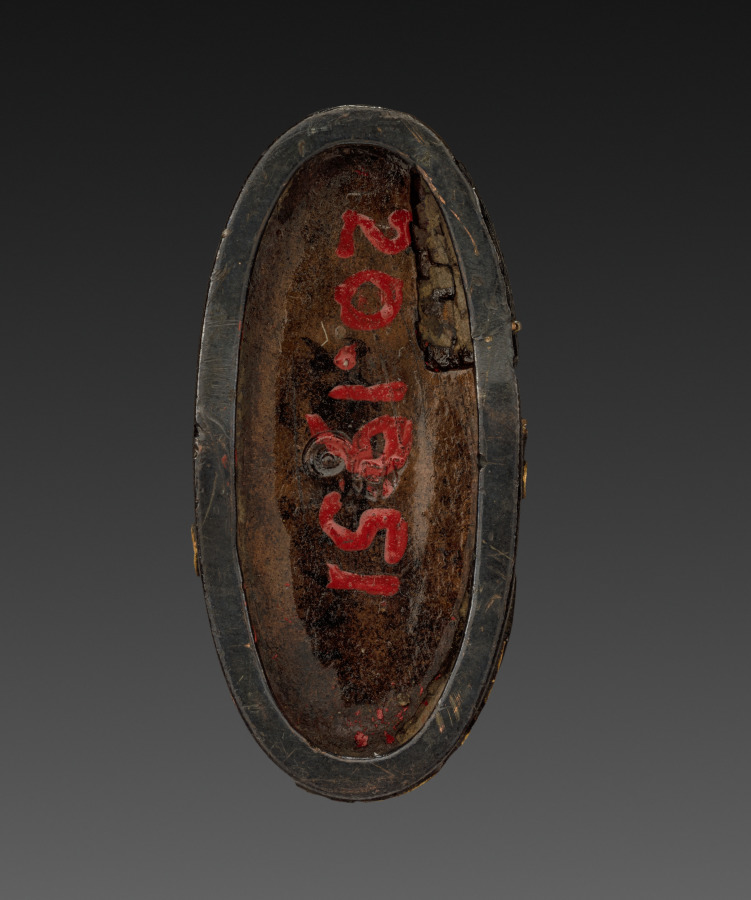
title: Sword-Hilt Pommel (Kashira)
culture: Japan, Edo period (1615–1868)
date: 1700–1850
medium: shakudo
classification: Arms and Armor